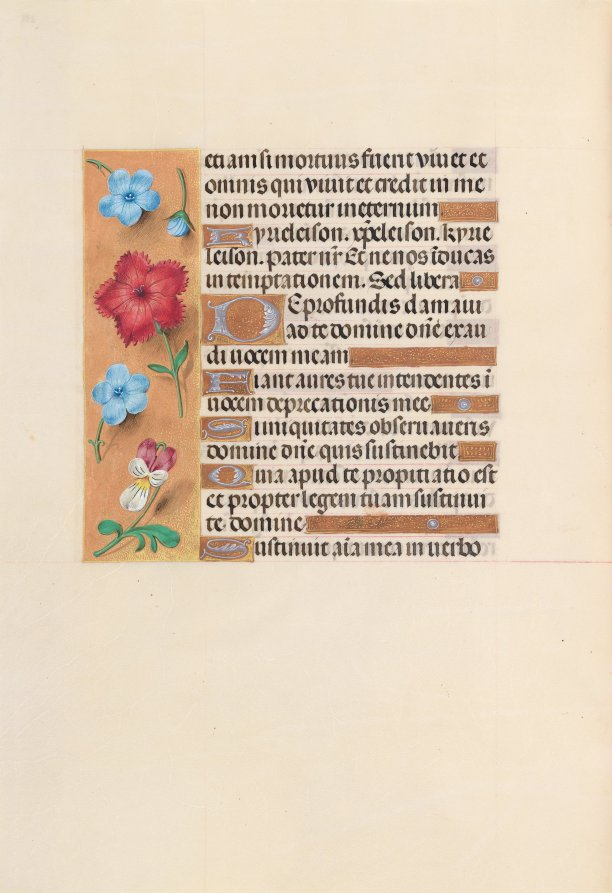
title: Hours of Queen Isabella the Catholic, Queen of Spain: Fol. 255v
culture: Flanders, Ghent and Bruges, late 15th century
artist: Master of the First Prayerbook of Maximillian (Flemish, c. 1444–1519)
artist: and Associates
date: c. 1500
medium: ink, tempera, and gold on vellum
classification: Bound Volume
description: This manuscript was illuminated by a circle of at least five highly organized manuscript painters active in the Flemish cities of Ghent and Bruges. The principal illuminator was Alexander Bening, who painted the majority of the book's miniatures. Manuscripts produced by this circle of artists are renowned for the decoration of their borders, which typically feature a rich variety of realistically-painted flowers, birds, and butterflies. This prayer book, called a book of hours, was intended not for a cleric, but for the private devotions of a lay person-in this case, Isabella the Catholic, Queen of Spain (1451-1504). Isabella's coat of arms embellishes the book's frontispiece. It is unlikely that the book was commissioned by the Queen herself; rather, she probably received it as a diplomatic gift from someone courting her patronage, perhaps Cardinal Francisco Jimenez de Cisneros. A Franciscan friar, Jimenez was dependent upon Isabella for his advancement, first to the post of Queen's confessor in 1492, and then to Archbishop of Toledo in 1495.